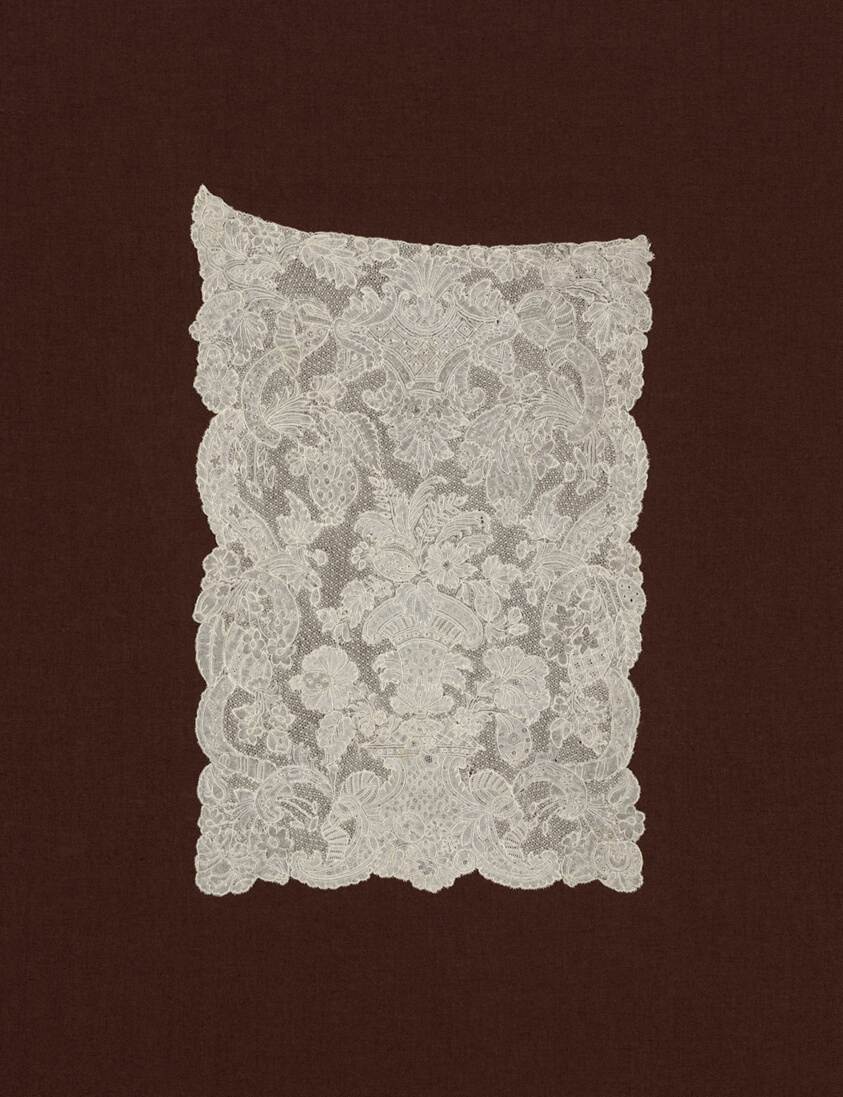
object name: Textile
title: Cravat End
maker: Flanders, Brussels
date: 1740s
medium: Linen, bobbin part lace of a type known as "Brussels" with snowflake type mesh ground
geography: Brussels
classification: textile; lace - bobbin